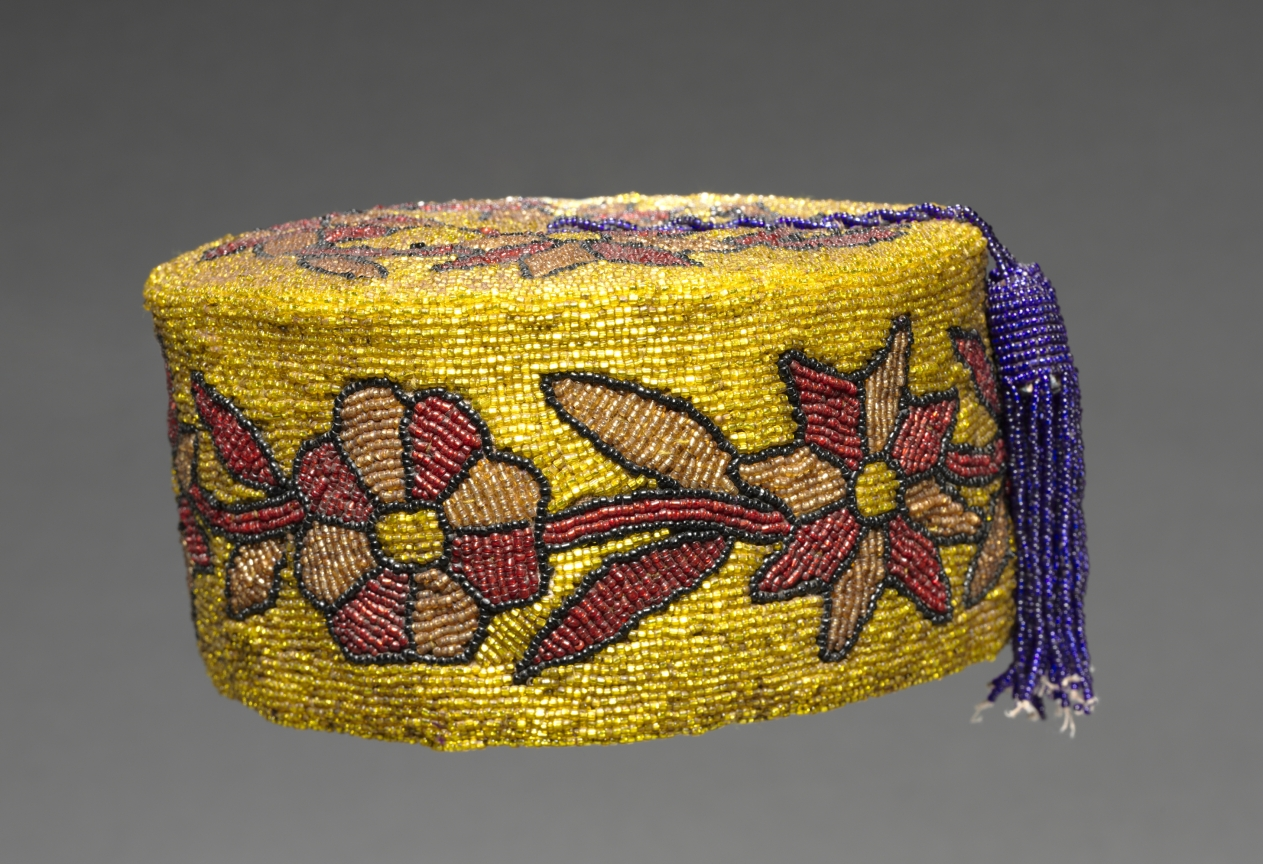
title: Coronet (oríkògbófo)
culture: Africa, West Africa, Nigeria, Yorùbá-style maker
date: 1900s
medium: Cloth, glass beads, and thread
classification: Garment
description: Like the rare conical crown (ade), the coronet (oríkògbófo) may only be worn by a king descended from Oduduwa, the first king of the Yorùbá. While the crown is reserved for special occasions, the coronet may be used by the king for less formal public events and when entertaining non-Yorùbá visitors. It signifies wealth rather than royal status.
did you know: The beads on this sculpture were imported, likely from Venice or Bohemia (now called the Czech Republic).